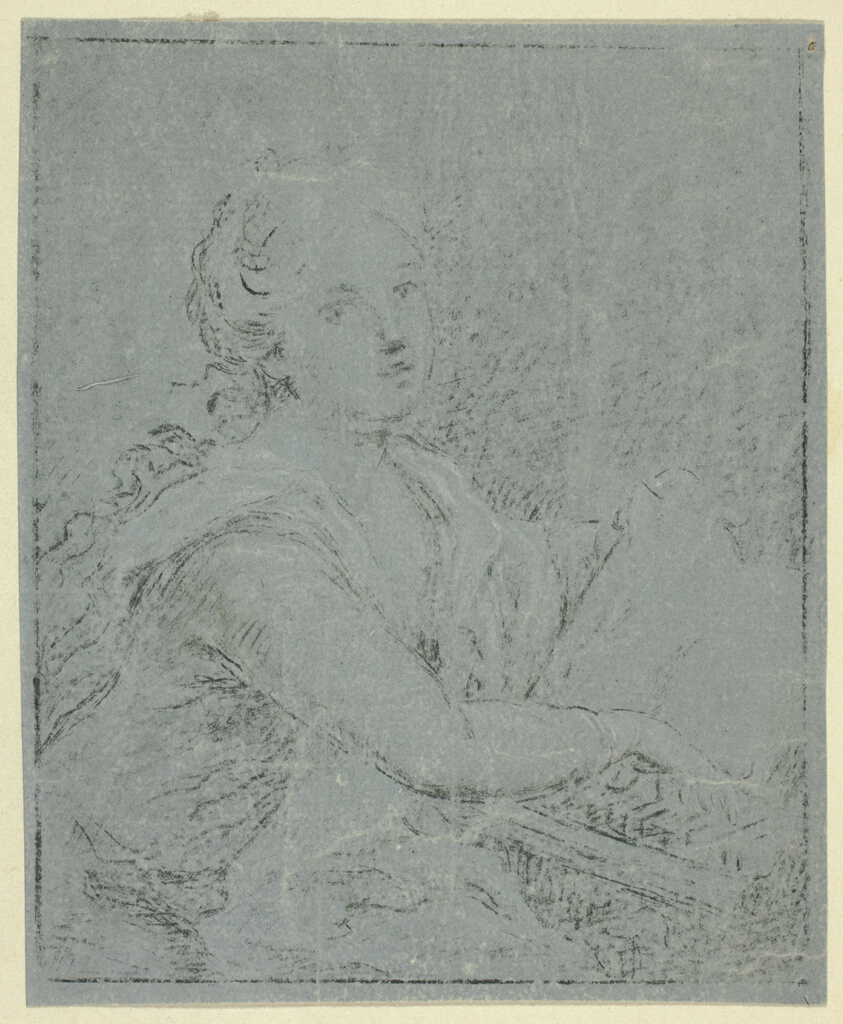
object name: Drawing and Watercolor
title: Woman at Spinet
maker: Attributed to Angelica Kauffmann; Swiss, 1741-1807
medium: Graphite, heightened with white chalk, on blue prepared ground, on off-white wove paper, tipped onto ivory wove paper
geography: Switzerland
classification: chalk; drawings (visual works); prints and drawing